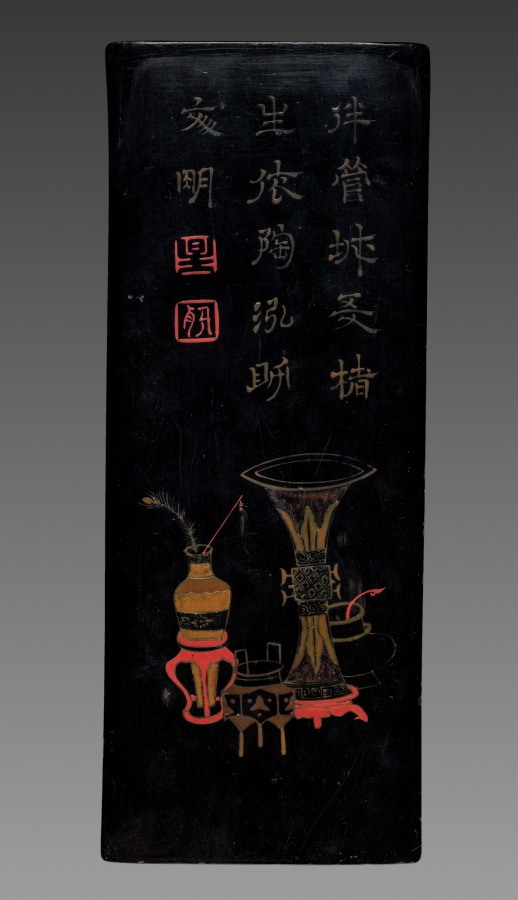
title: Ink Cake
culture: China, Qing dynasty (1644-1911)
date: 19th Century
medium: ink cake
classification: Miscellaneous